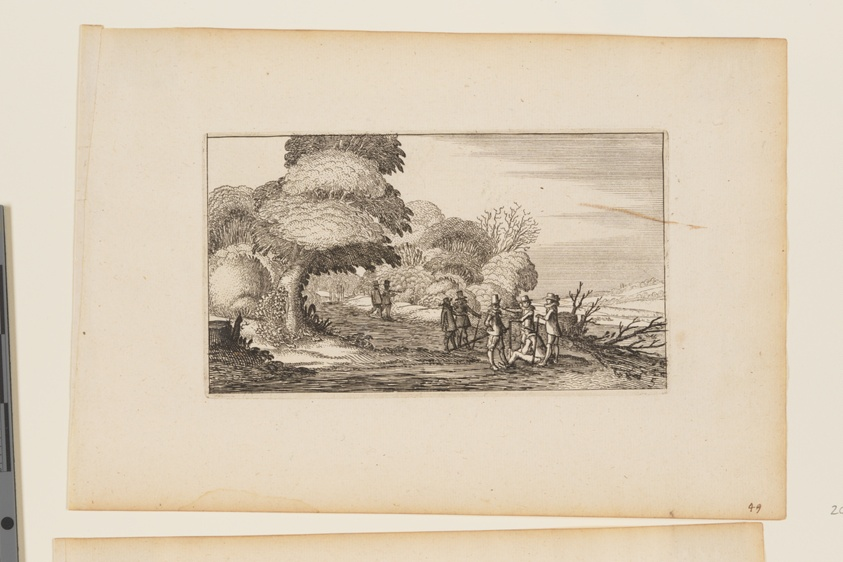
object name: Print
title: Men with Muskets on a Path leading through Woods, from Twelve landscapes with Figures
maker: After Gillis van Scheyndel; Dutch, 1595–1660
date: 1624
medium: Etching on ivory laid paper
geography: Netherlands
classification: etching; paper; print; prints and drawing